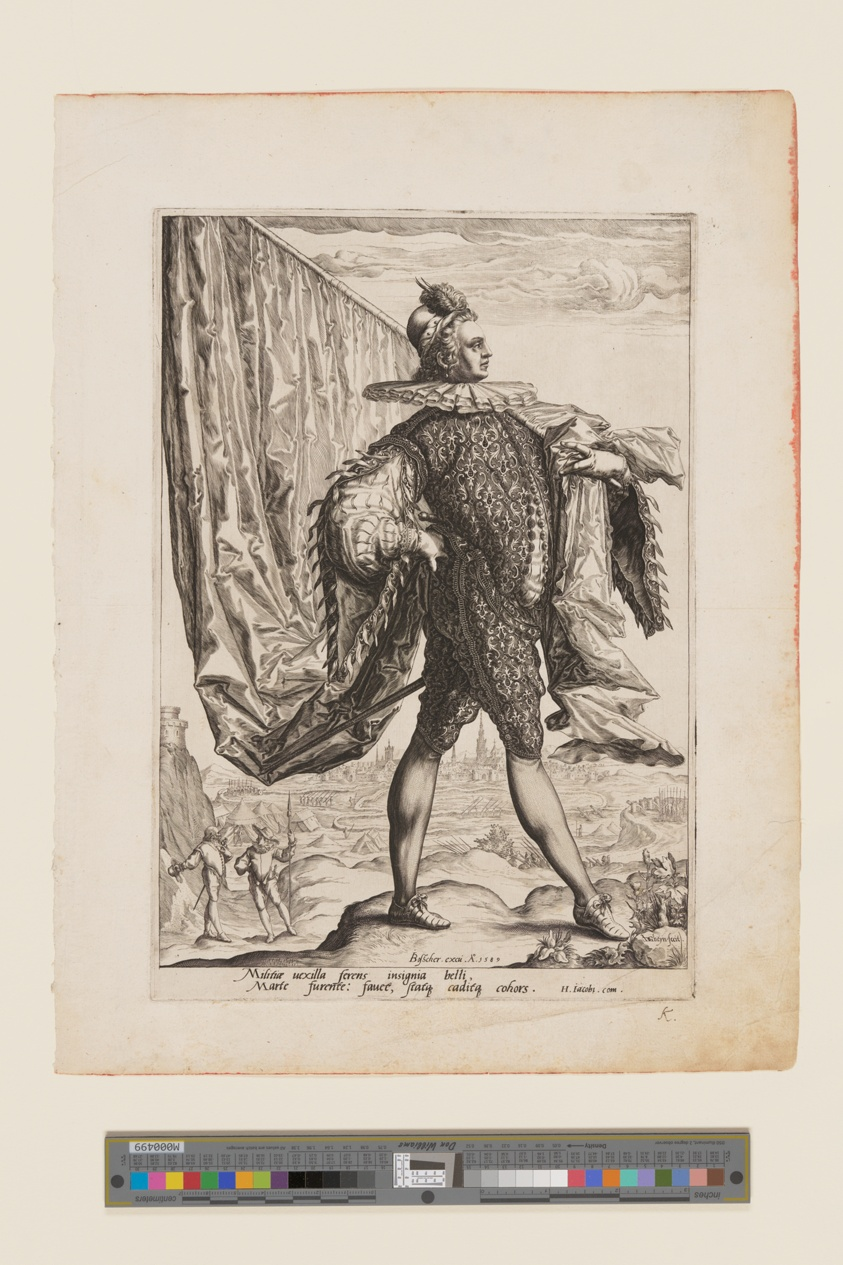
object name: Print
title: Standard Bearer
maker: Jacques de Gheyn II; Dutch, 1565–162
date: 1589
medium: Engraving on ivory laid paper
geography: Netherlands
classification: engraving; paper; print; prints and drawing